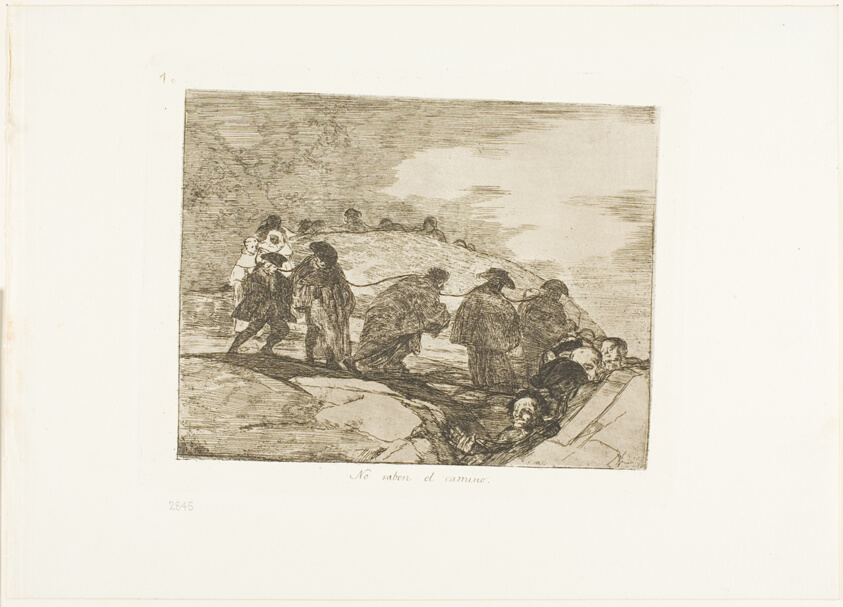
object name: Print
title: They Do Not Know the Way, plate 70 from The Disasters of War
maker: Francisco José de Goya y Lucientes (Spanish, 1746-1828)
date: 1815/20, published 1863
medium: Etching, drypoint, burin and burnishing on ivory wove paper with gilt edges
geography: Spain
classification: etching; print; prints and drawing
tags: war